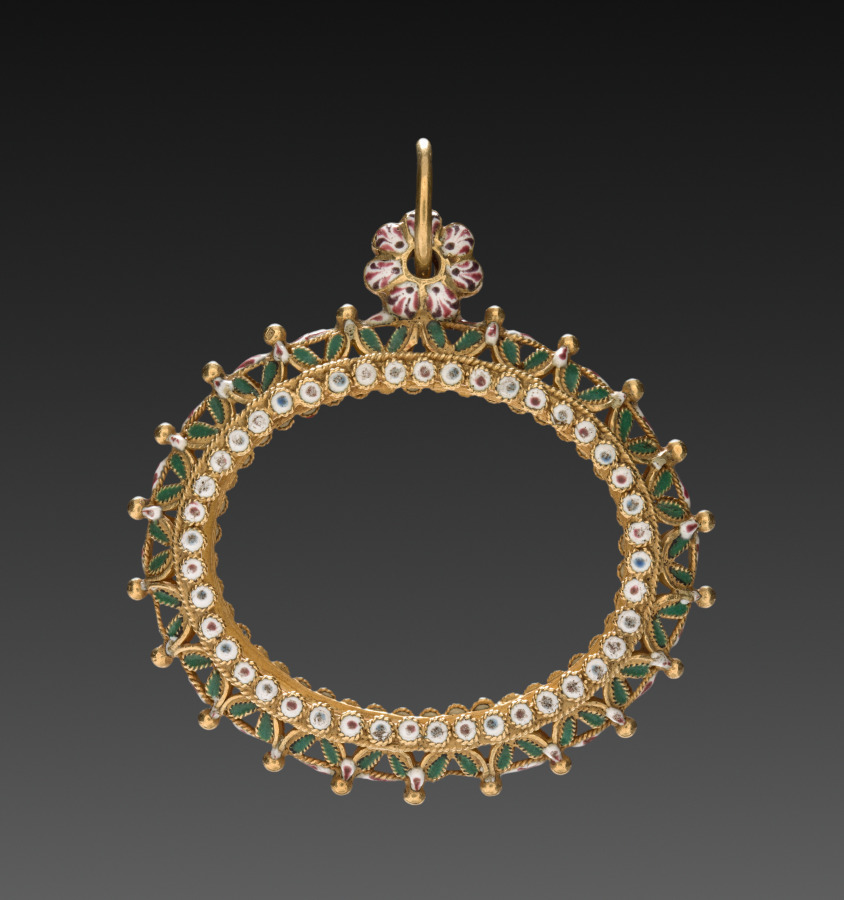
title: Pendant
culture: Spain, late 17th century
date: late 1600s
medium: gold and enamel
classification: Jewelry